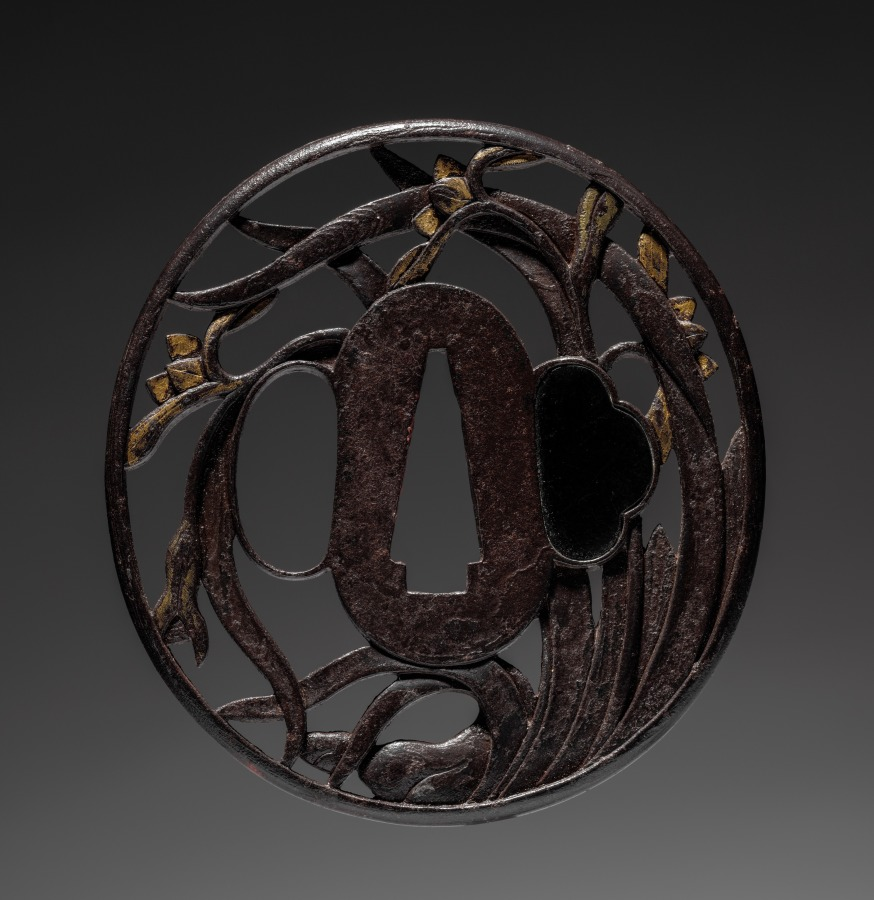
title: Sword Guard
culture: Japan, Edo period (1615–1868)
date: 1615–1868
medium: iron (Choshu type)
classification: Arms and Armor